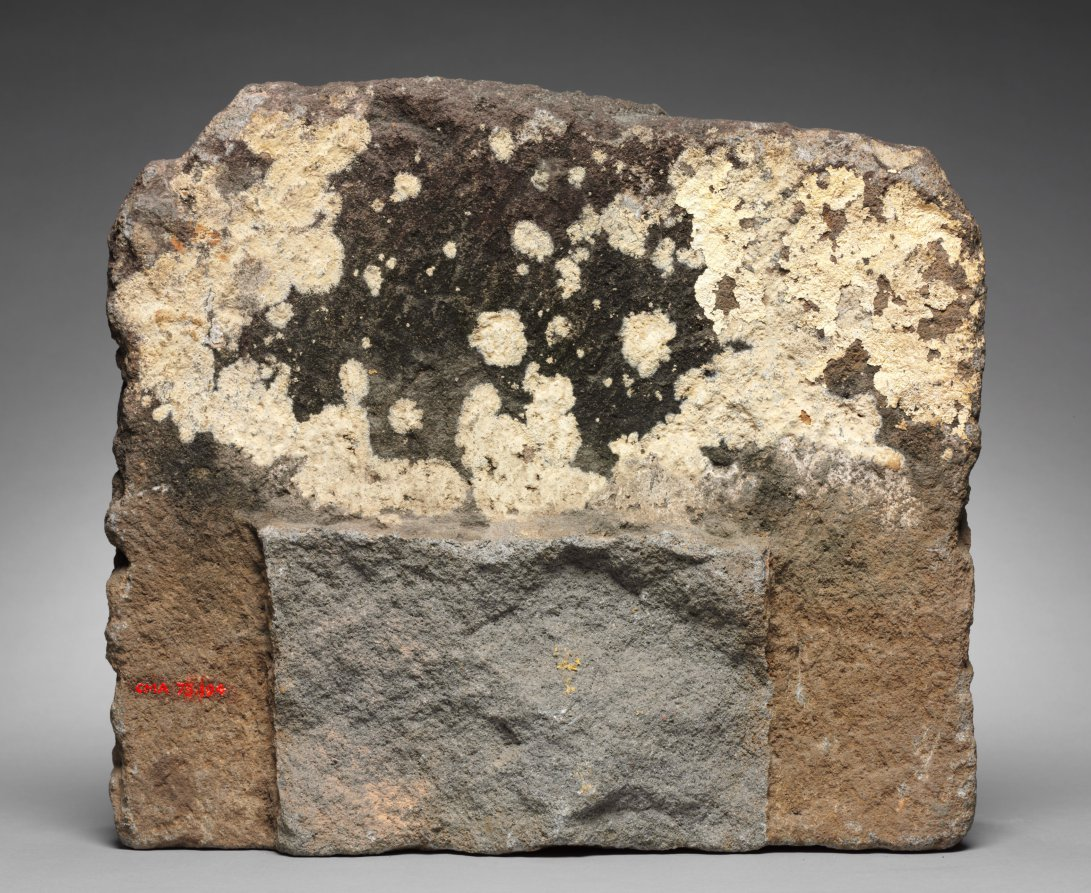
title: Architectural Sculpture: Face of Time (Kala-mukha)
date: 1100s–1300s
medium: volcanic stone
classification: Sculpture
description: The bulging eyes and curved fangs of Kala emphasize the ferocity of the figure who stands for Time and Death, the devourer of all creation. Placed above the entry to an Indonesian temple, Kala serves both to protect the site and indicate a symbolic rebirth for those who pass beneath to enter the sacred space. Though related to the faces of glory on monuments in India, Kala and the volcanic stone from which it has been carved are distinctively Javanese.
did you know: The fiercest looking Kala masks are from eastern Java, made between the 10th to 15th century.